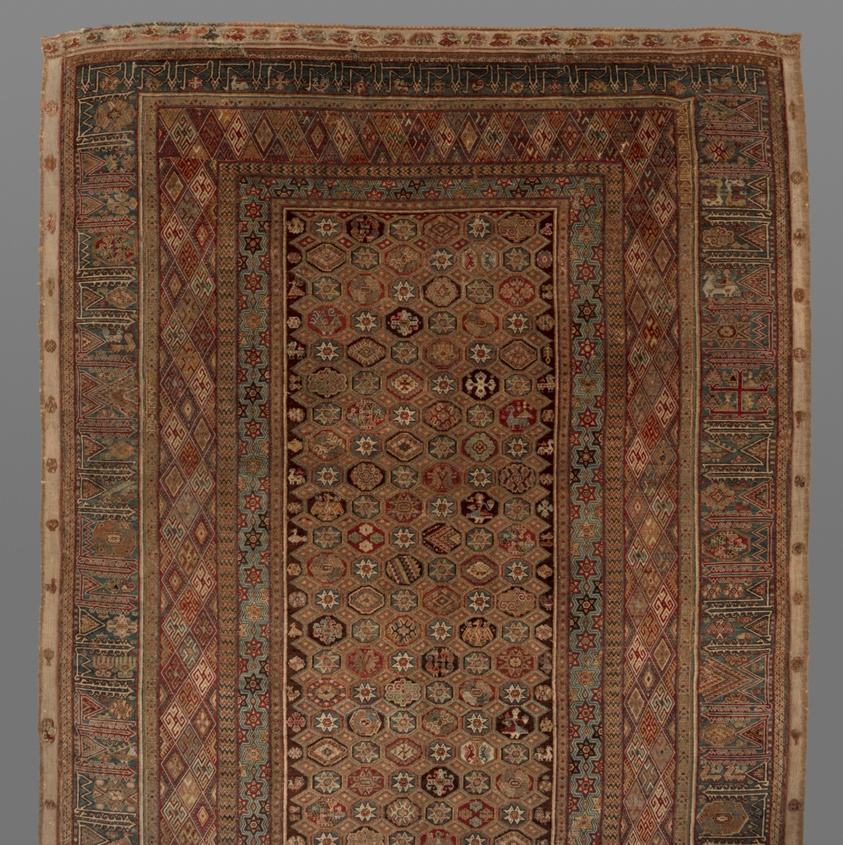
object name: Textile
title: Carpet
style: medieval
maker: Spain; probably Murcia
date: 1450/1500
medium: Wool, Spanish knots on plain weave ground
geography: Spain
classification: textile; weaving - carpet